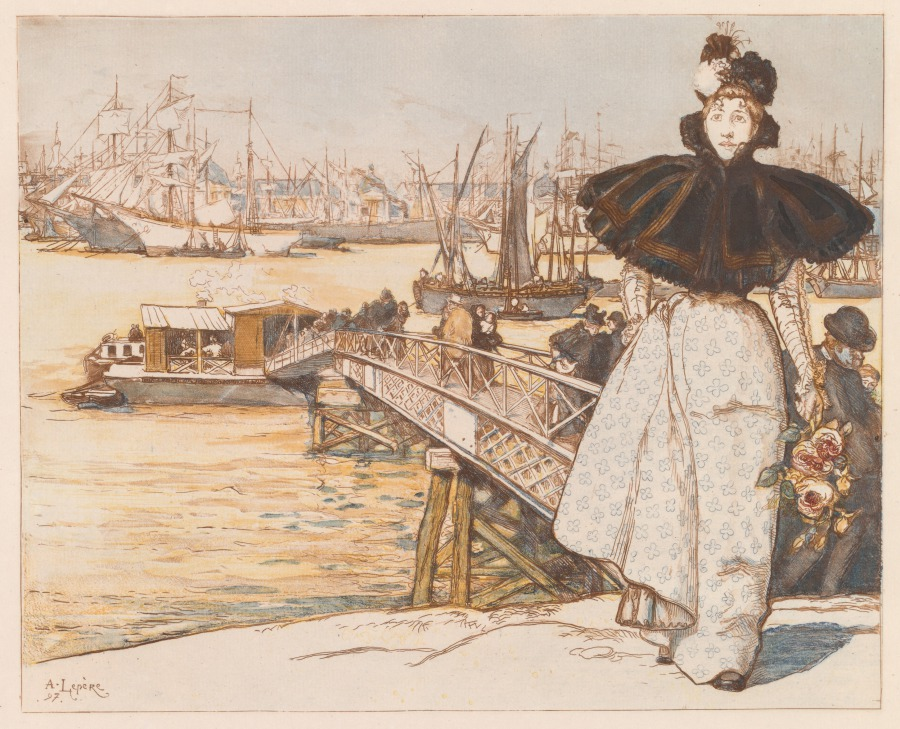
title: Pier on the Garonne, Bordeaux (Embarcadère sur la Garonne, Bordeaux)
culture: France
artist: Auguste Louis Lepère (French, 1849–1918)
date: 1897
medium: color etching and aquatint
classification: Print